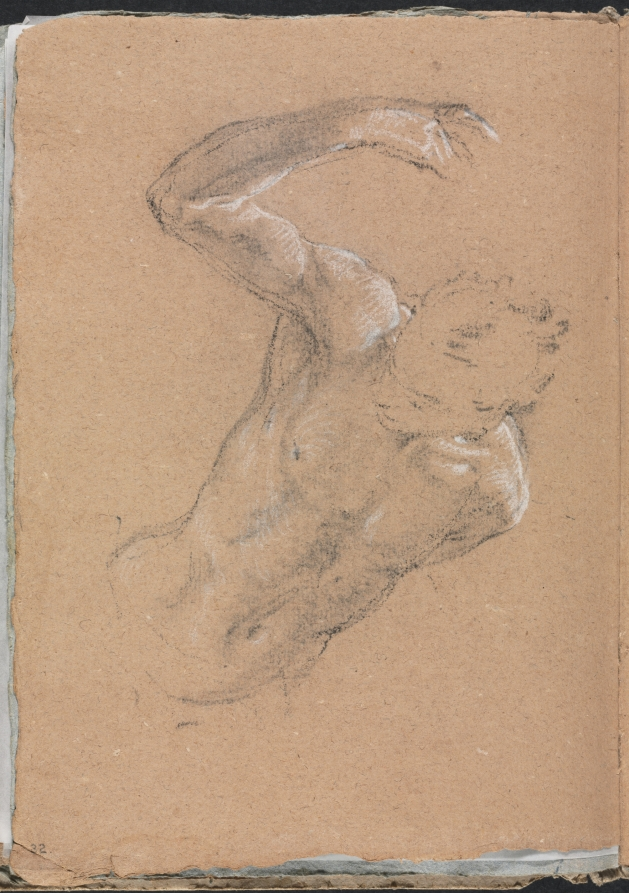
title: Verona Sketchbook :Male nude with upraised right arm (page 32)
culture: Italy, 18th century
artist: Francesco Lorenzi (Italian, 1723–1787)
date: 1760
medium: black chalk with white heightening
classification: Bound Volume